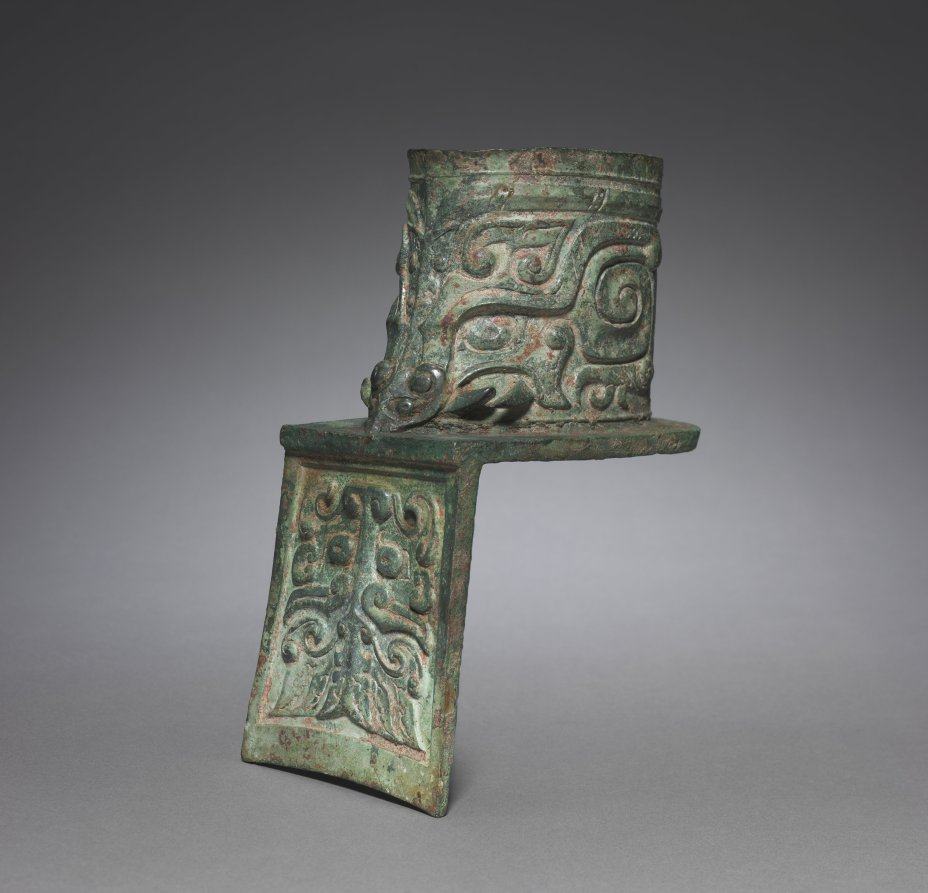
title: Chariot Axle Cuff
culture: China, Henan province, Western Zhou dynasty (c. 1046–771 BCE)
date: c. 1046–771 BCE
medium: bronze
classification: Metalwork